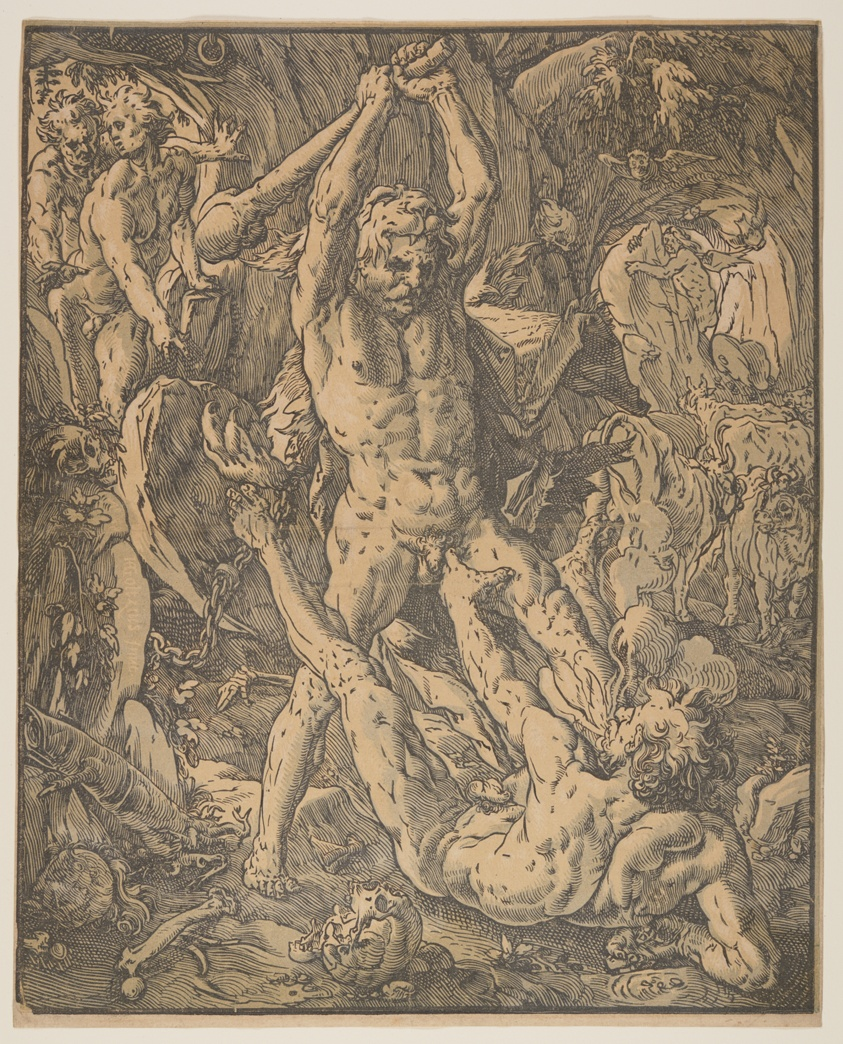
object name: Print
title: Hercules and Cacus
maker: Hendrick Goltzius (Dutch, 1558–1617)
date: 1588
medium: Chiaroscuro woodcut from three blocks in yellow and gray-green on paper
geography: Netherlands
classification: print; paper; prints and drawing; woodcut